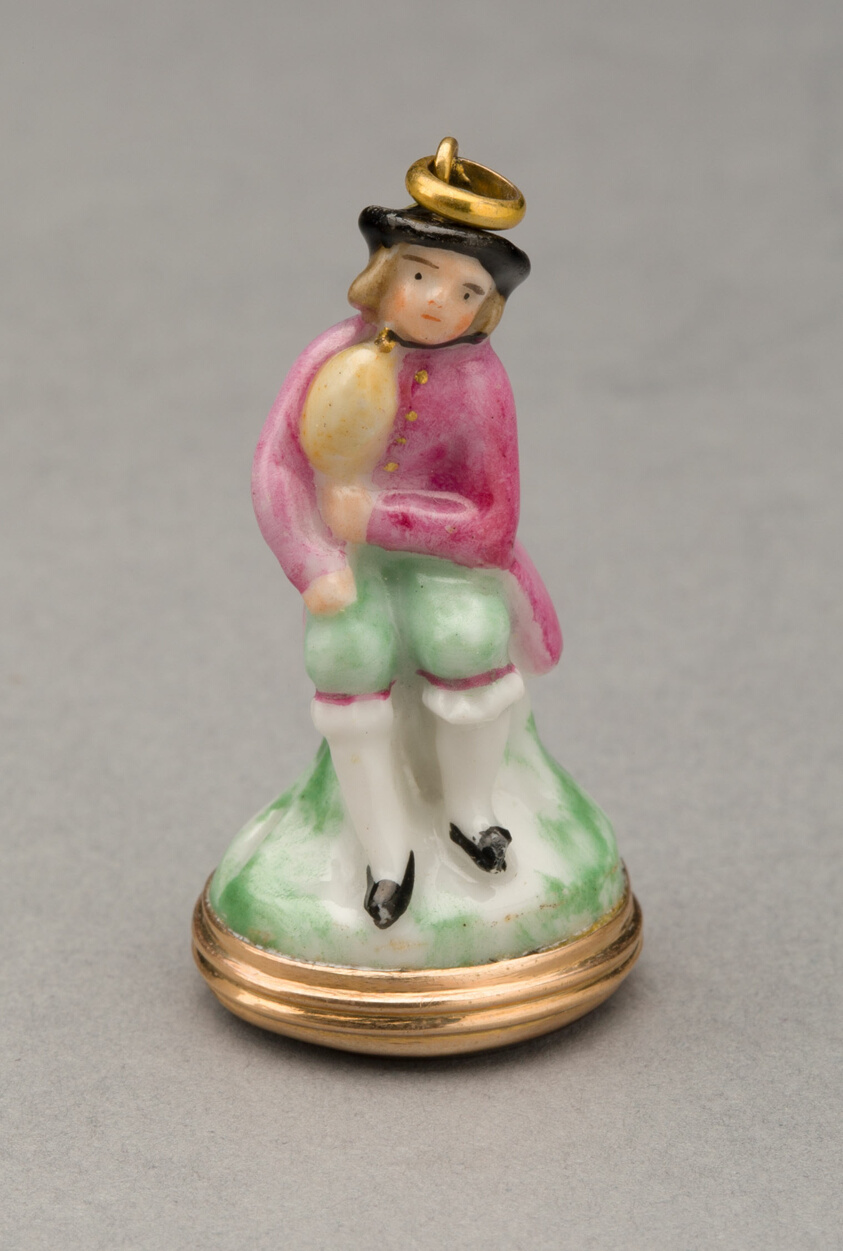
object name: Ceramics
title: Seal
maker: Chelsea Porcelain Manufactory; London, England, c. 1745-1784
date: 1750/70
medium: Soft-paste porcelain, polychrome enamels and gilding; hardstone and metal mount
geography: Chelsea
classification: porcelain; ceramics; european decorative arts